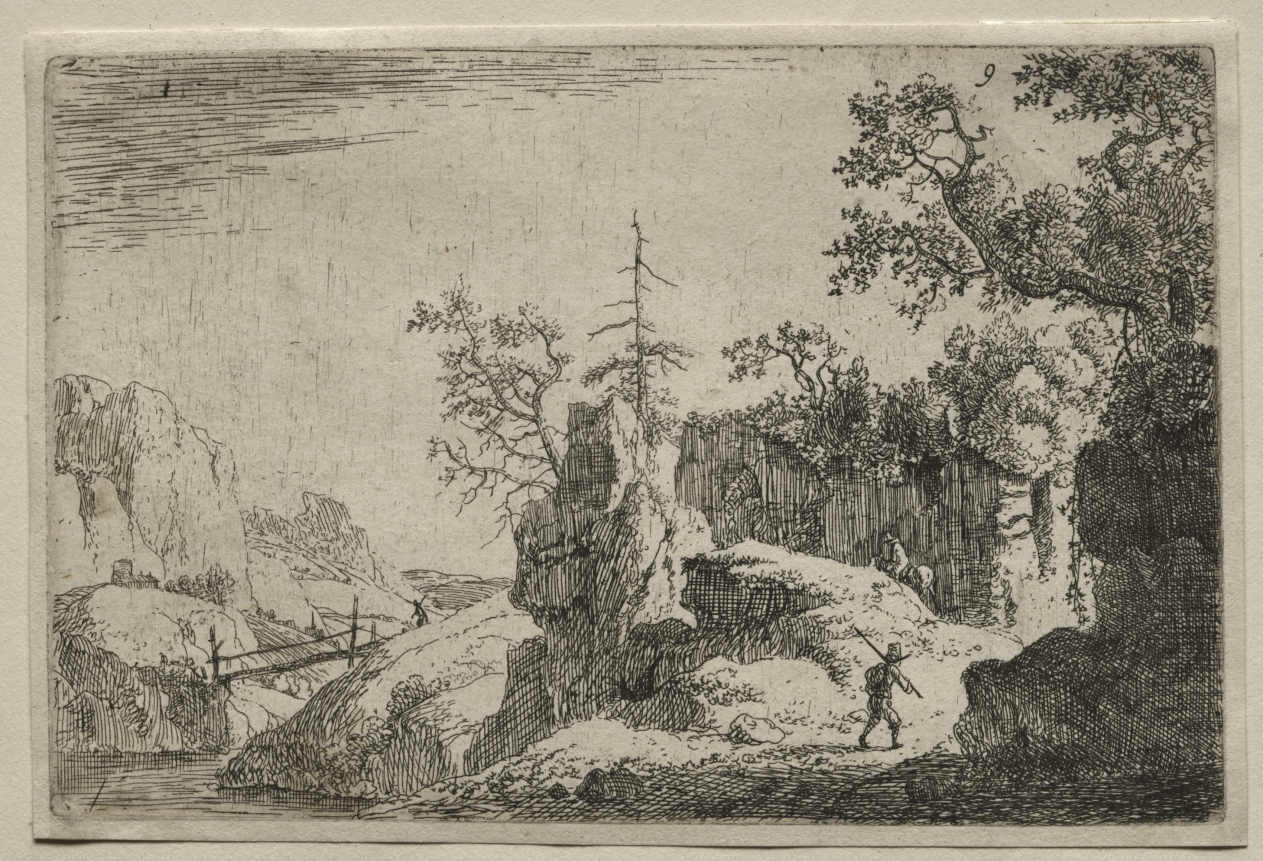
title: A Mountain Landscape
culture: Netherlands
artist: Jan van Aken (Dutch)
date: c. mid 17th century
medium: etching and engraving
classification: Print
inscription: upper right, in plate: 9 ; VERSO, center, in graphite: B. 15 I ; lower center, in graphite: C 7191 ; lower right, in graphite: C. 6083